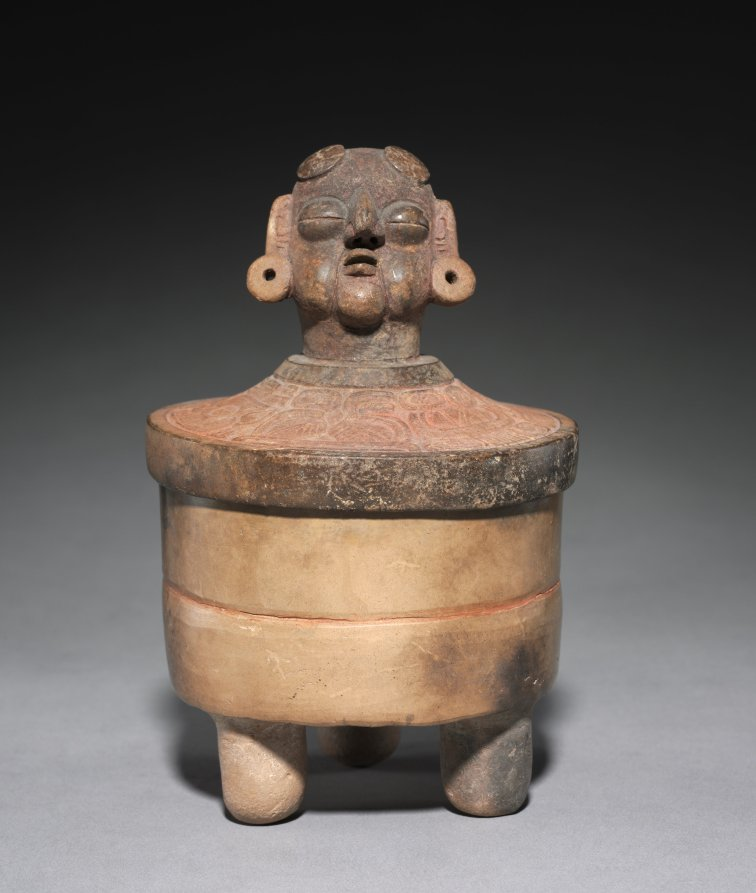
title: Tripod Vessel with Lid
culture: Mexico or Central America, Maya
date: 250–600 CE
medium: earthenware with pigment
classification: Ceramic